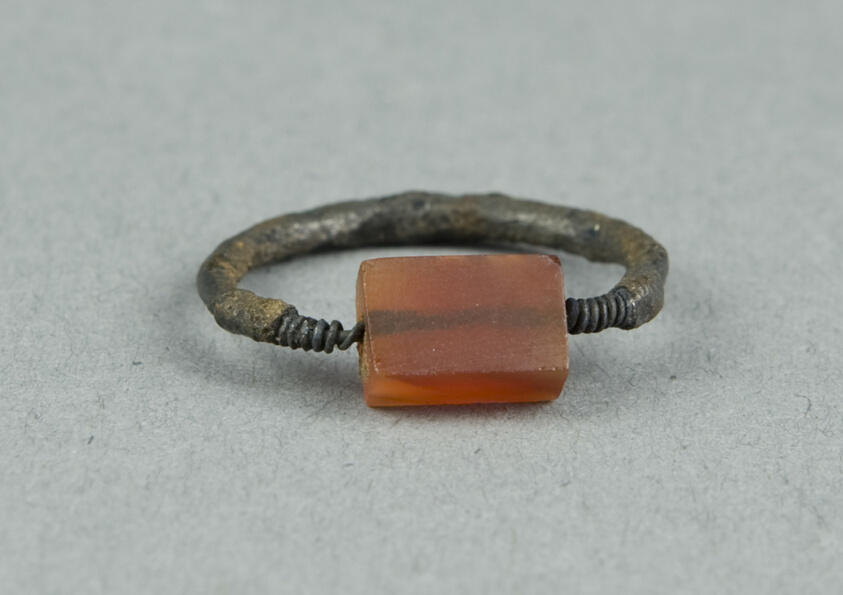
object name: Costume and Accessories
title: Ring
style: twenty-first dynasty, third intermediate period, egyptian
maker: Egyptian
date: New Kingdom–Third Intermediate Period, Dynasties 18–25? (about 1550–656 BCE)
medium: Carnelian, silver (or electrum)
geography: Egypt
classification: silver; metal; jewelry; ancient art; costume